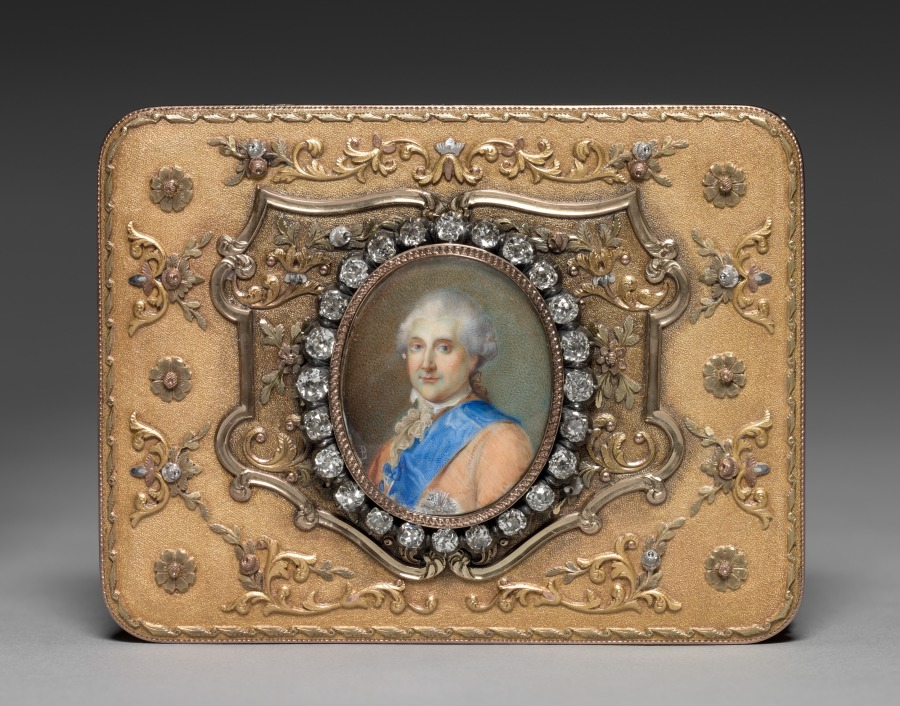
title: Portrait of a Man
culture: Switzerland, Neufchatel, mid-19th century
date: mid 1800s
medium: watercolor on ivory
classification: Miscellaneous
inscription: signed: "B."